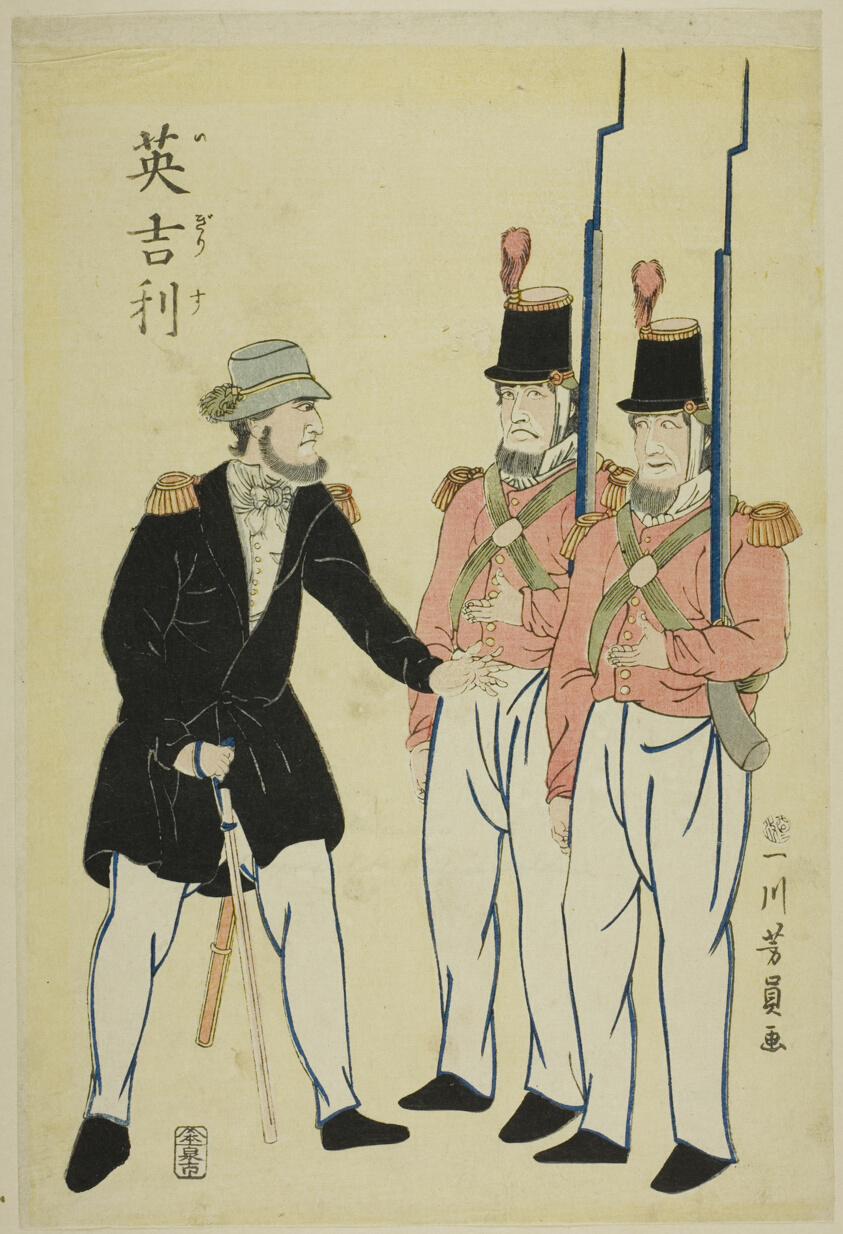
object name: Print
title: Dutchman Strolling (Orandajin yuko)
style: Japanese (culture or style)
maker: Utagawa Yoshifuji (Japanese, 1828–1887)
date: 1861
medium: Color woodblock print; oban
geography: Japan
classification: woodblock print; print; asian art